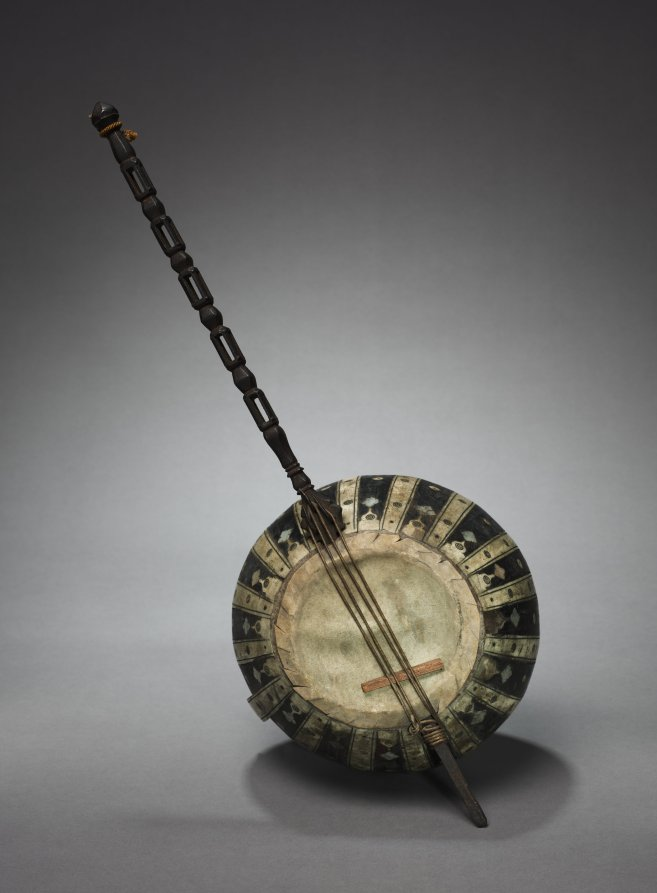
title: Kamānche (incomplete)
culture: Northern Iran (Caucasian, maybe Azerbaijan, or Kashmir)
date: 1875–1900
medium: Wood, hide, and bone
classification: Musical Instrument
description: Kamānche is a Persian term first used in the 10th century to describe an instrument that is sounded with a bow. From there, bowed instruments spread to Byzantium, Central Asia, the Far East, and then to Europe. In Egypt, it is known as the rabāb, a term known throughout the Islamic world from North Africa to Southeast Asia. The names of musical instruments often reveal origin, context, or musical function. In Europe, North Africa, and Asia where contact with Middle Eastern culture occurred, variations of Arabic and Persian terms for instruments are widespread. Usually, related names refer to similar instruments; however, this is not always true. Among these "floating terms" are the names zūrna, rabāb, kāmanja, nāy, and dombak.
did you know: The instrument's spike would be placed on the ground or today, on the knee, when it was played.